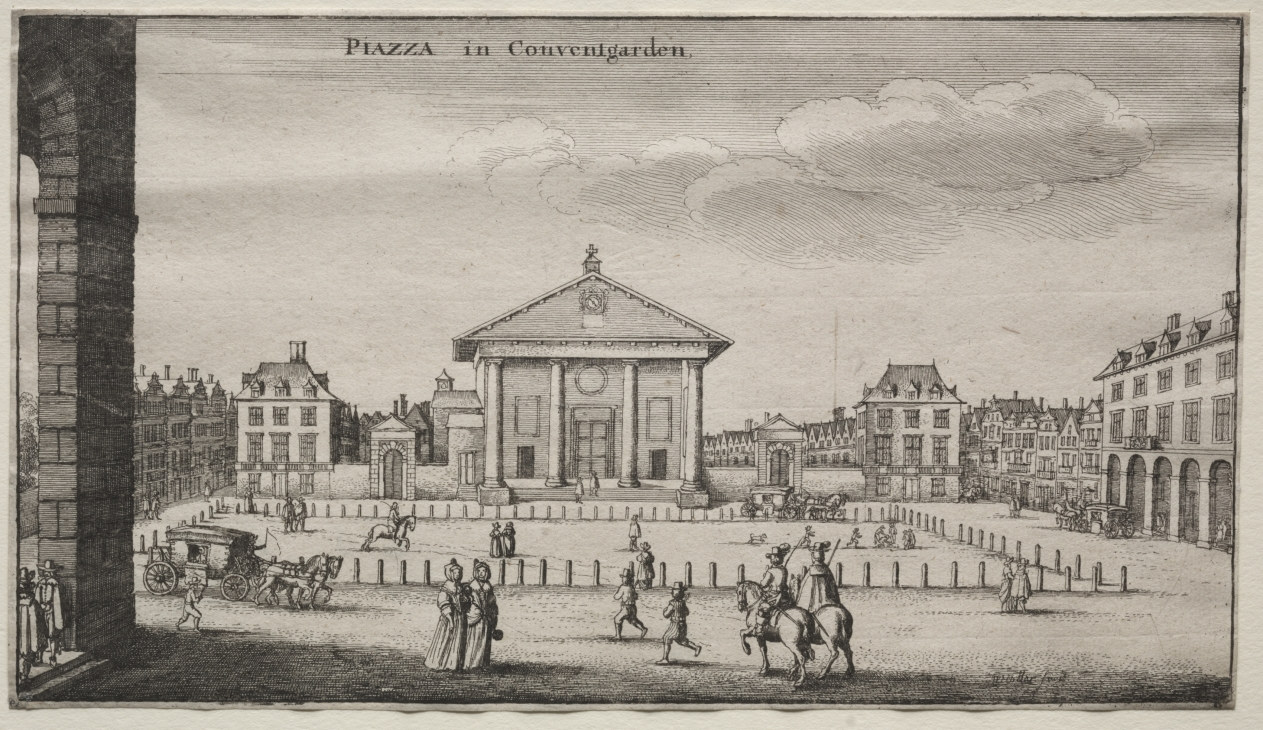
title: Views of London: The Piazza in Covent Garden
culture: Bohemia, 17th century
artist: Wenceslaus Hollar (Bohemian, 1607–1677)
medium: etching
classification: Print